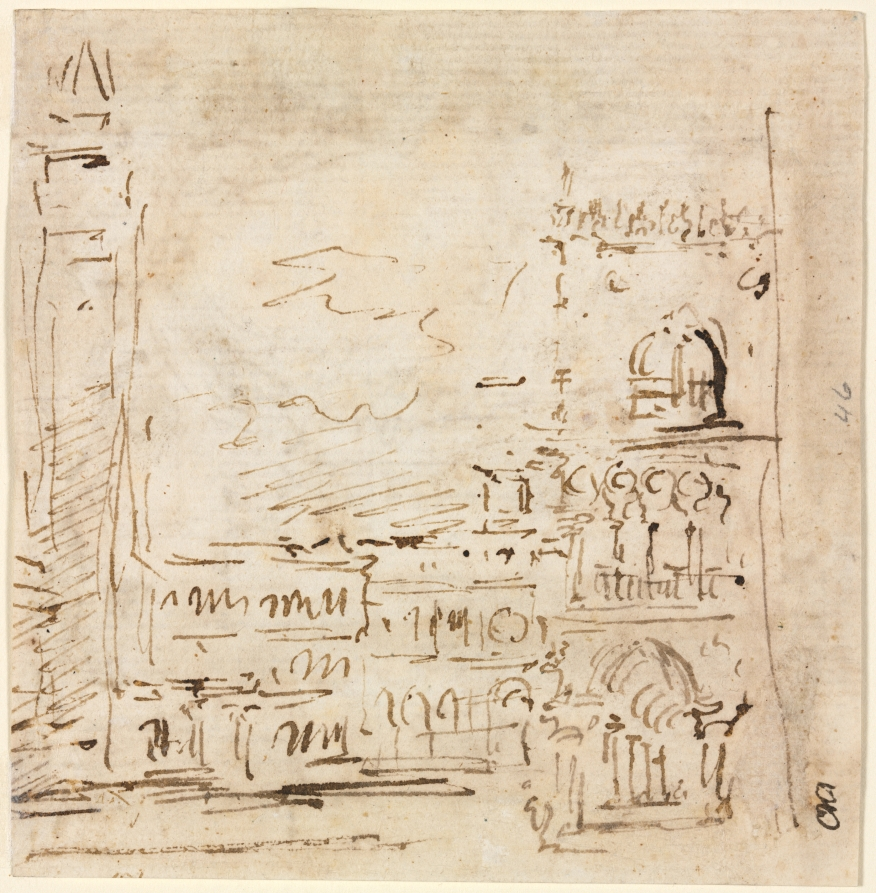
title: Piazza San Marco with Doges' Palace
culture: Italy, 18th century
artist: Francesco Guardi (Italian, 1712–1793)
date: 1773–1778?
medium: pen and brown ink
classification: Drawing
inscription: center right, in graphite: 46 [sideways]